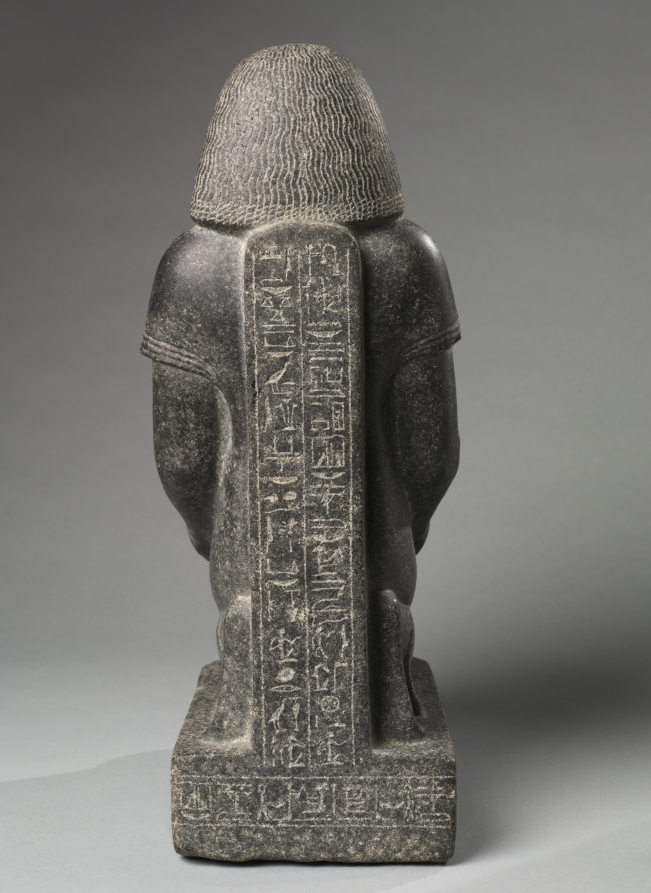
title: Statue of Minemheb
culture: Egypt, New Kingdom (1540–1069 BCE), Dynasty 18, reign of Amenhotep III (1390–1352 BCE)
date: c. 1391–1353 BCE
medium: granodiorite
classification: Sculpture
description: Minemheb was one of the many court officials who helped prepare for Amenhotep III's 30-year jubilee festival. Clearly, Minemheb regarded this as the high point of his career, since his title as chief of construction for the jubilee temple is the primary one provided on this statue. It is actually a statue within a statue: Minemheb kneels to present a small altar, upon which squats a statue of the god Thoth in baboon form. Carved in extremely hard stone, Minemheb's statue is nonetheless carefully detailed and superbly modeled. Special attention was given to the rendering of the baboon's face. The heavy-lidded eyes and furrowed brow give the animal an almost contemplative expression.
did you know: The baboon in this sculpture is the god Thoth in one of his animal forms.